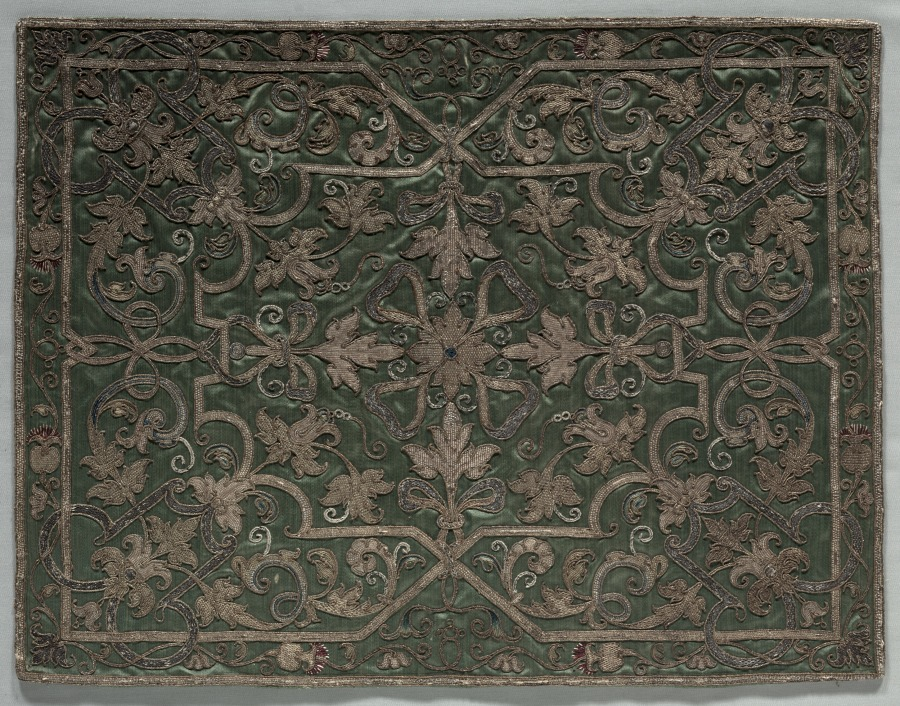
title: Apparel from a Dalmatic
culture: Italy, early 16th century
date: early 1500s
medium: embroidery; silk and metallic threads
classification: Embroidery